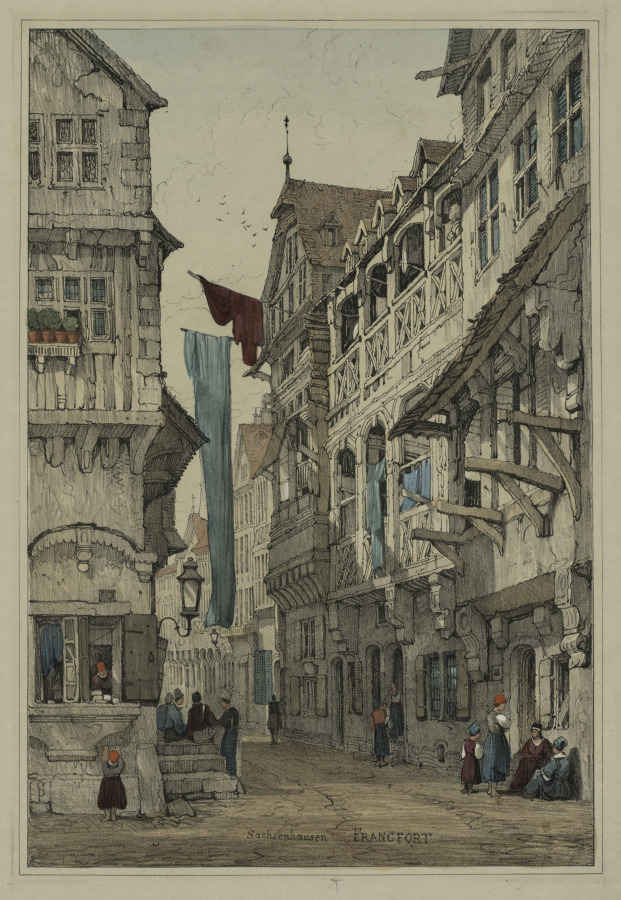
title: Facisimilies of Sketches made in Flanders and Germany: Sachsenhausen Francfort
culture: Italy, 19th century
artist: Samuel Prout (British, 1783–1852)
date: 1833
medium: Hand-colored lithograph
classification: Print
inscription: Lower right margin, in graphite: CAN'T DECIPHER From Lockett: "Drawn on stone by Samuel Prout F.S.A., Painter in Water Colours in Ordinary to Her Majesty the Queen, 50 tinted plates, 22 x 125 in. Published by the artist (repub. Rights later sold to Charles Tilt ( n.d.). Printed by C. Hullmandel."